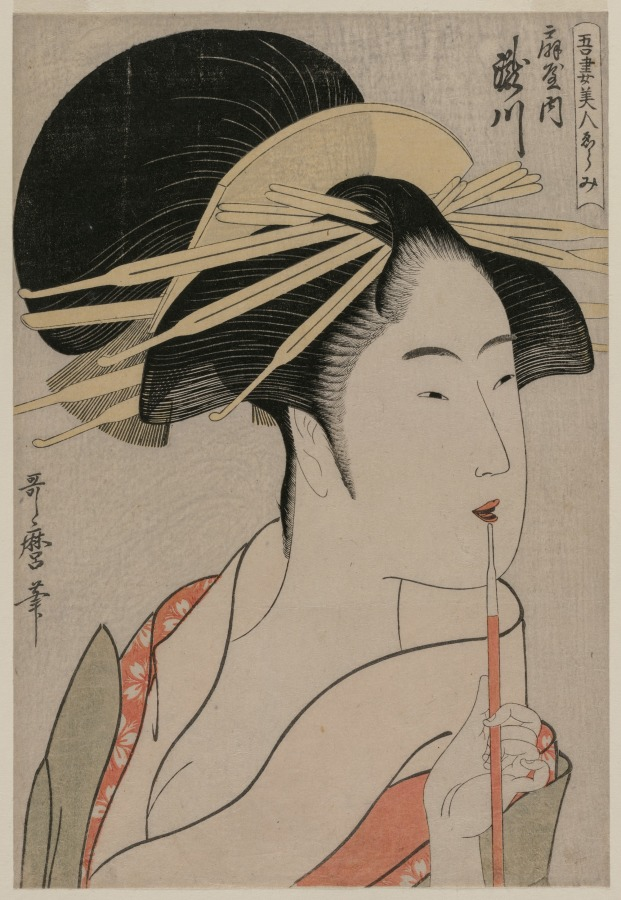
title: Takigawa of the Ōgiya from the series A Selection of Eastern Beauties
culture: Japan, Edo period (1615–1868)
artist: Kitagawa Utamaro (Japanese, c. 1754–1806)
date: c. 1798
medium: color woodblock print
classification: Print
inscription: Signature: Utamaro hitsu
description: The courtesan Takigawa worked for the Ōgiya, "House of Fans" brothel, one of the most prestigious in the Yoshiwara. Here, she smokes tobacco, a fashionable trend in 18th-century Edo. Fashion-conscious women in Edo purchased prints of the most famous beauties just as contemporary women buy fashion magazines to learn about the latest styles in make-up and hair. The strands of hair at her temple were printed from thin pieces of wood left in relief when the areas on either side of them were carved away.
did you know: Takigawa became the most senior courtesan of the Ōgiya following the retirement of Hanaōgi.